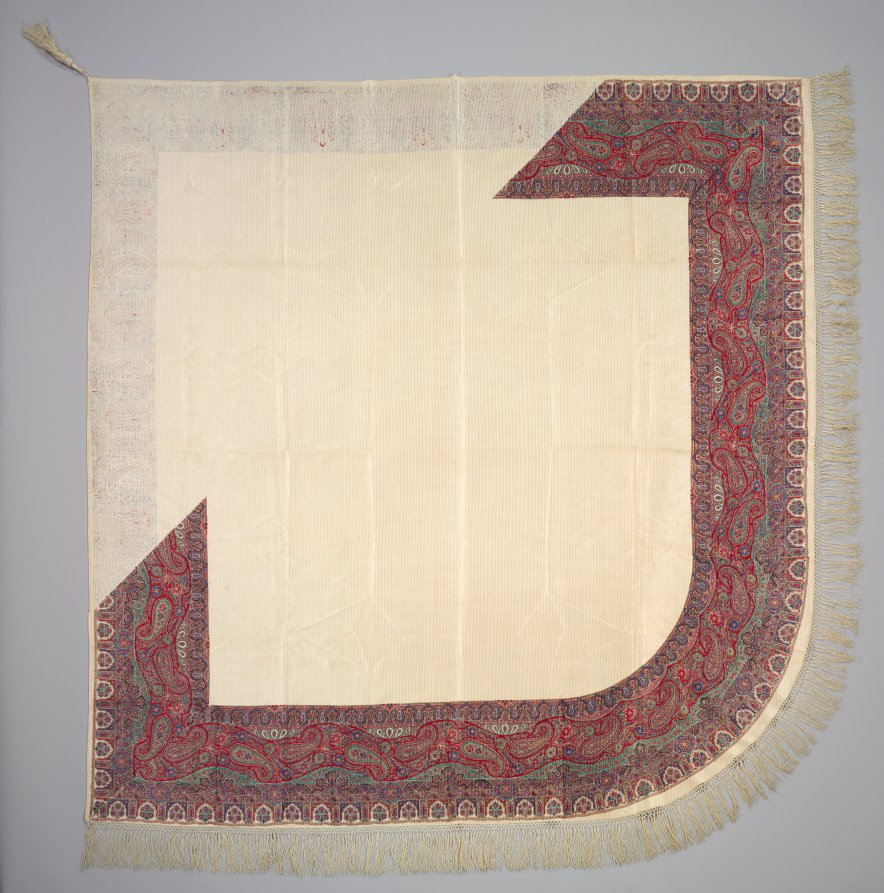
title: Printed Silk Turnover Shawl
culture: France, 19th century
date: 1835–1840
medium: silk; woven and printed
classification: Textile